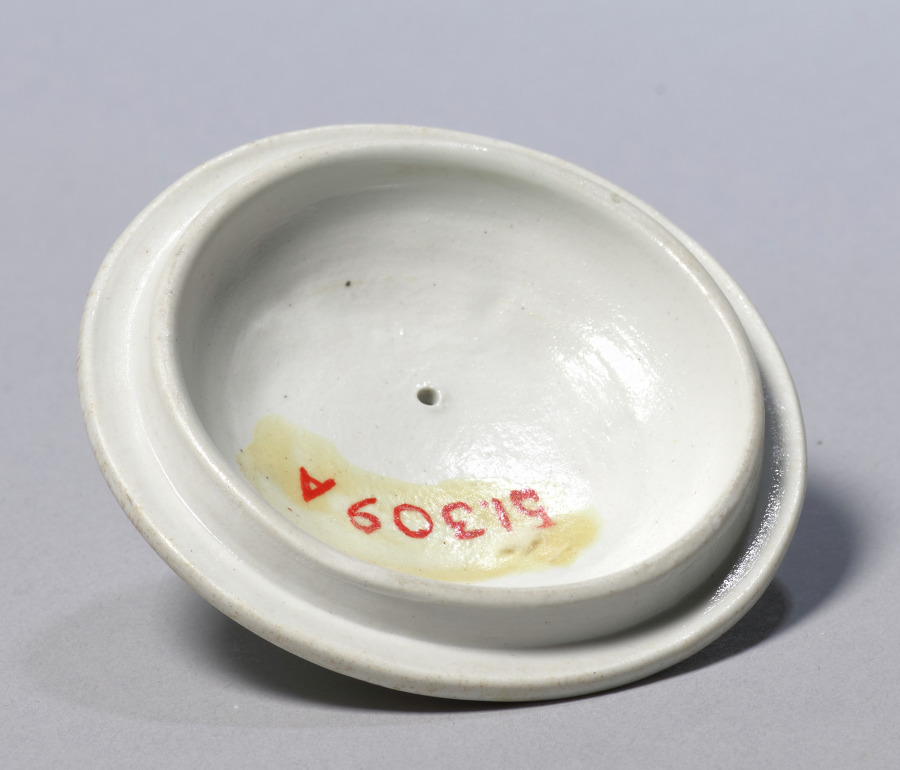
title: Teapot (lid)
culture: England, Staffordshire, 19th century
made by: Wedgwood Factory (British)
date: c. 1830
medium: stoneware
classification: Ceramic